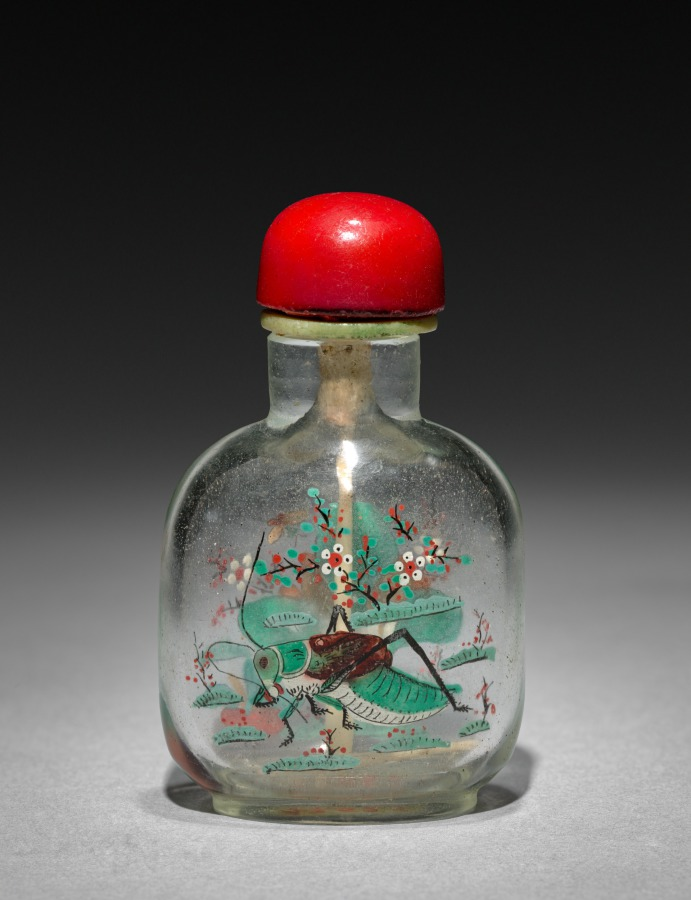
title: Snuff Bottle with Stopper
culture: China, Qing dynasty (1644-1911)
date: 1800s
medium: glass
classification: Glass